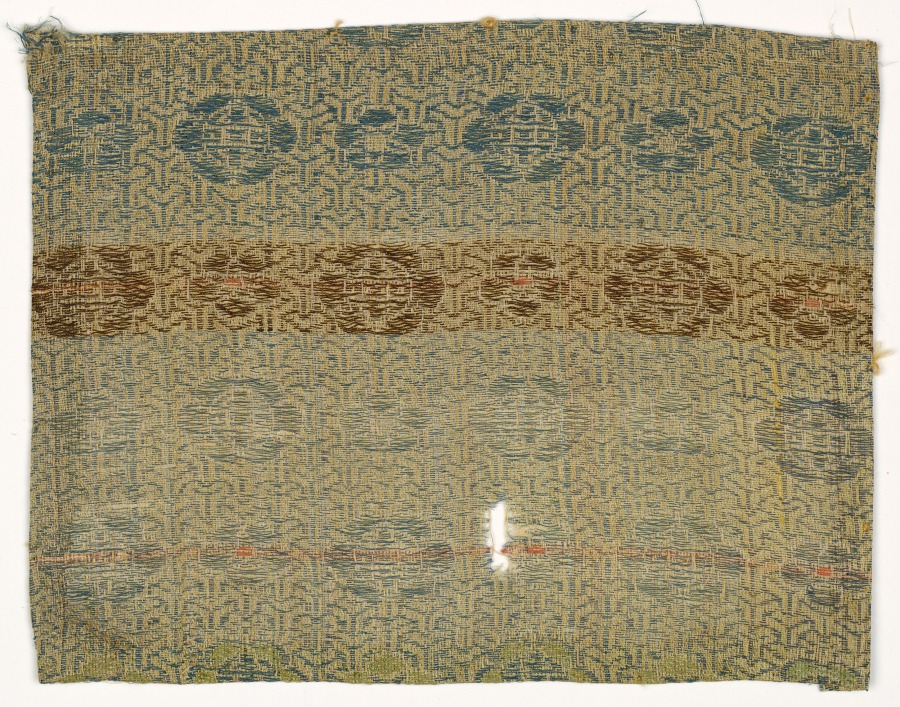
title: Fragment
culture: China ?, 19th century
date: 1800s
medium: silk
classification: Textile